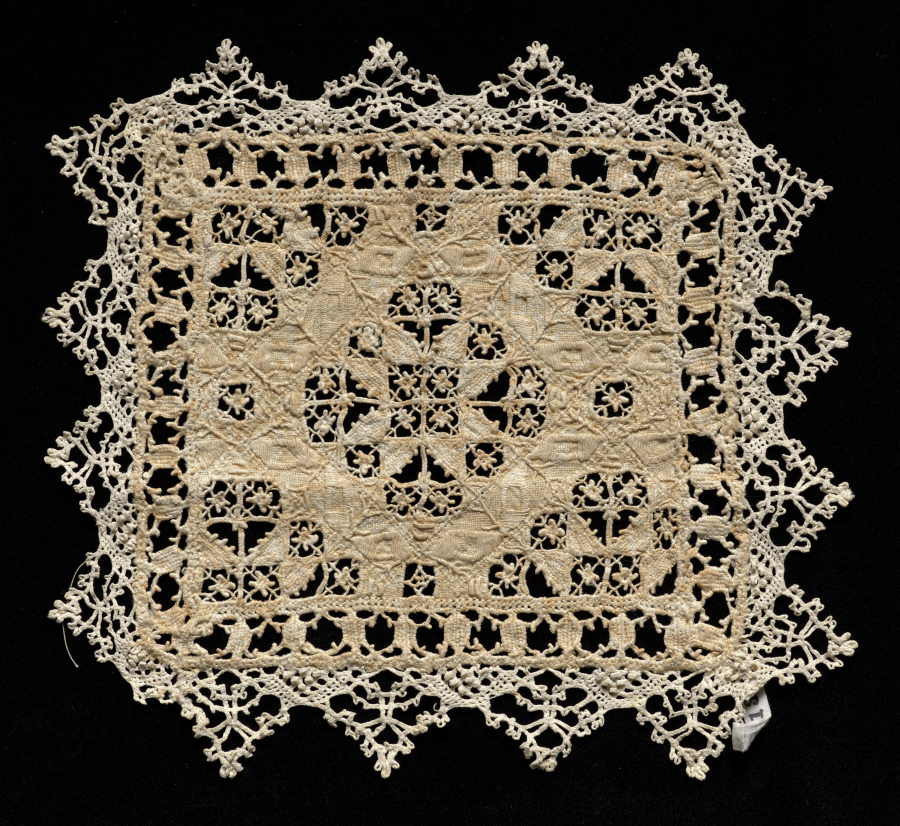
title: Lace Square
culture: Italy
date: 1500s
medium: Linen: needle lace (cutwork) and bobbin lace and embroidery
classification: Lace